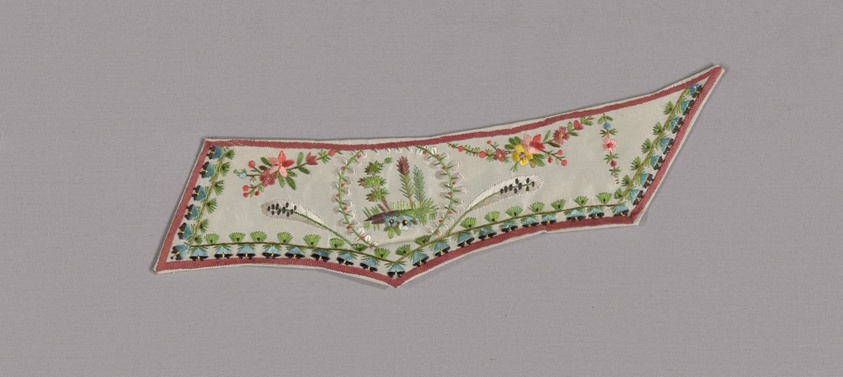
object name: Costume and Accessories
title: Embroidered Fabric for a Man's Waistcoat Front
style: 18th Century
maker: France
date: 1780s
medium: Silk, plain weave; embroidered with silk thread in individual back, outline, running, satin, split and stem stitches; couching; laid work and French knots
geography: France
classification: costume; needlework (visual works); waistcoat (garment); textile; costume - embroidery; needlework - costume; garment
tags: floral motifs, flowers, foliage, white (color), green (color), pink (color), building, floral, bird, wreaths, feathers, fashion, houses